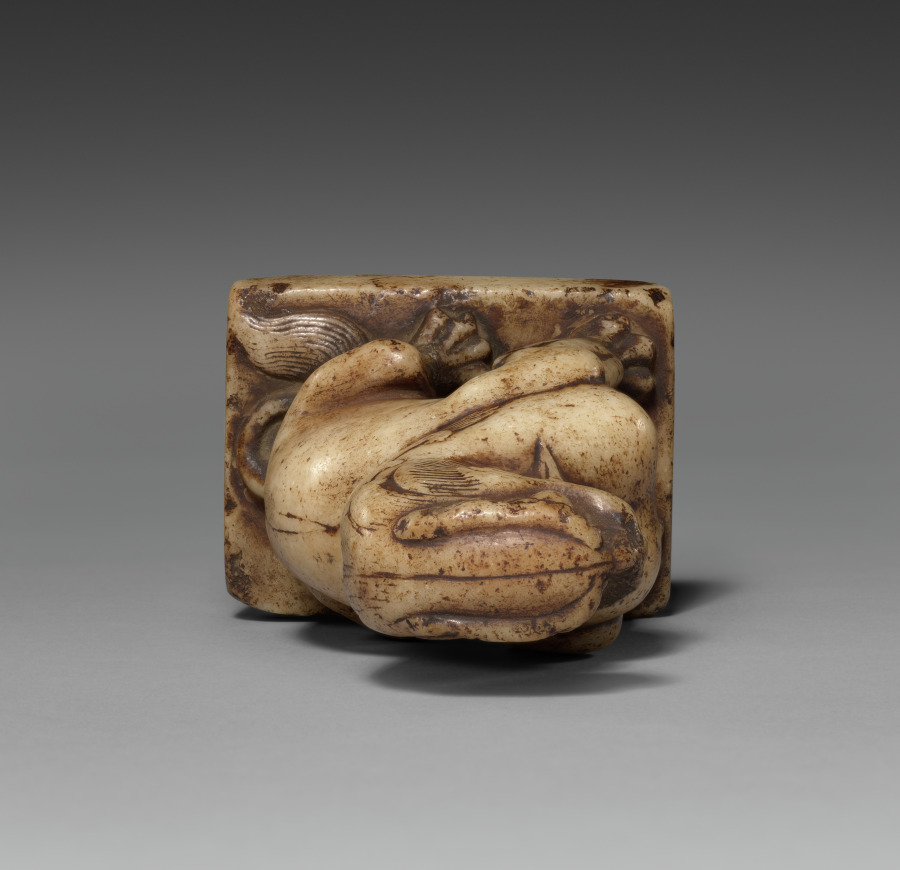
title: Lion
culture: China, Tang dynasty (618-907)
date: 618–907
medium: marble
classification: Sculpture